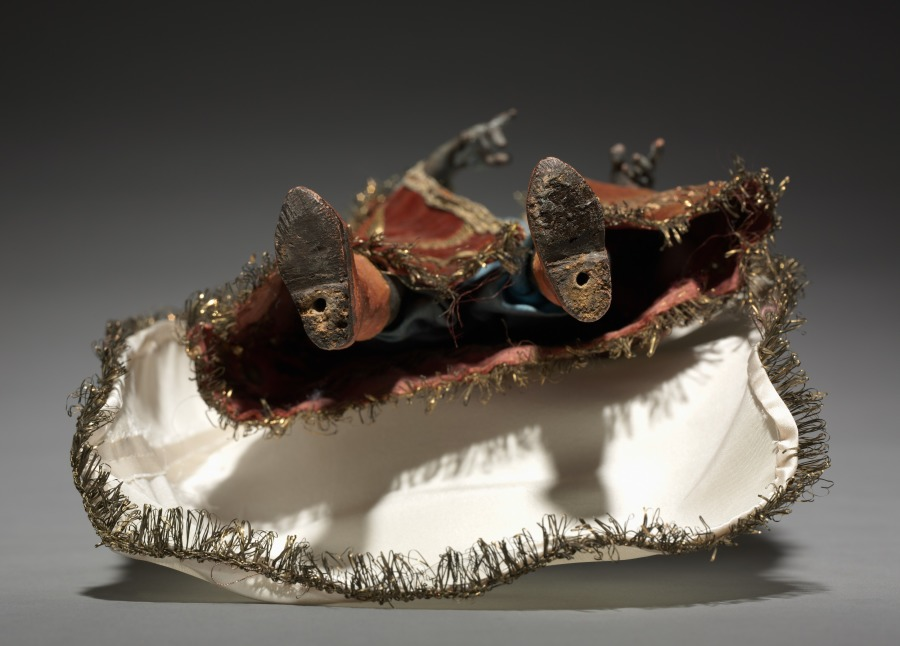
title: Figure from a Crèche: Negro Magus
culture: Italy, Naples, late 18th-early 19th century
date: 1780–1830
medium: painted wood and terracotta with various textiles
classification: Sculpture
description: The practice of creating scenes of the Nativity for the home dates from the early 1700s in Italy, where people began to set up doll-like figures of about a foot or less in height. The custom was particularly popular in Naples around 1800, where crèche scenes (crèche means cradle, or crib) included many figures, whose heads and hands of painted terracotta, stuffed cloth bodies, and clothing adapted from contemporary local costumes gave them an amazingly realistic character. Representations of the birth of Jesus can be traced to the first few centuries of Christianity. Both living creatures and sculptural depictions of them were used from early times. By the late middle ages it was customary to create life-size figures of wood or stone, naturalistically painted, to represent the characters who participated in the events of Jesus's early life. These sculptures were then arranged in scenes illustrating one or both of the most important of these events, the Adoration of the Shepherds and the Adoration of the Magi-the three kings from the East who came to pay homage to the Christ child. Used in churches, these large figures were especially popular in Italy, Central Europe, Spain, and Portugal.